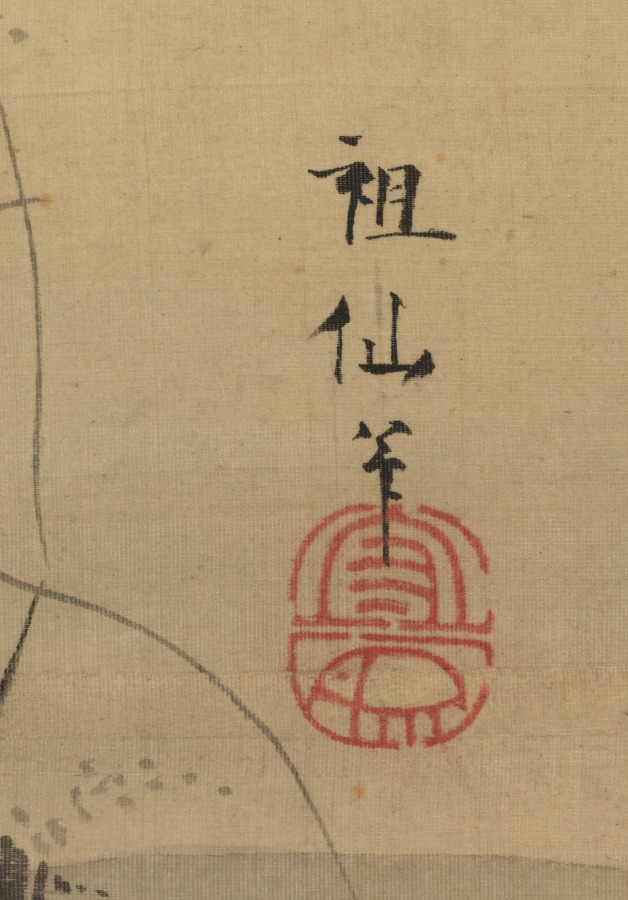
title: Monkeys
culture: Japan, Edo period (1615–1868)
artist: Mori Sosen (Japanese, 1747–1821)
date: early 1800s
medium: hanging scroll; ink and light color on silk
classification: Painting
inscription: Signature and seal